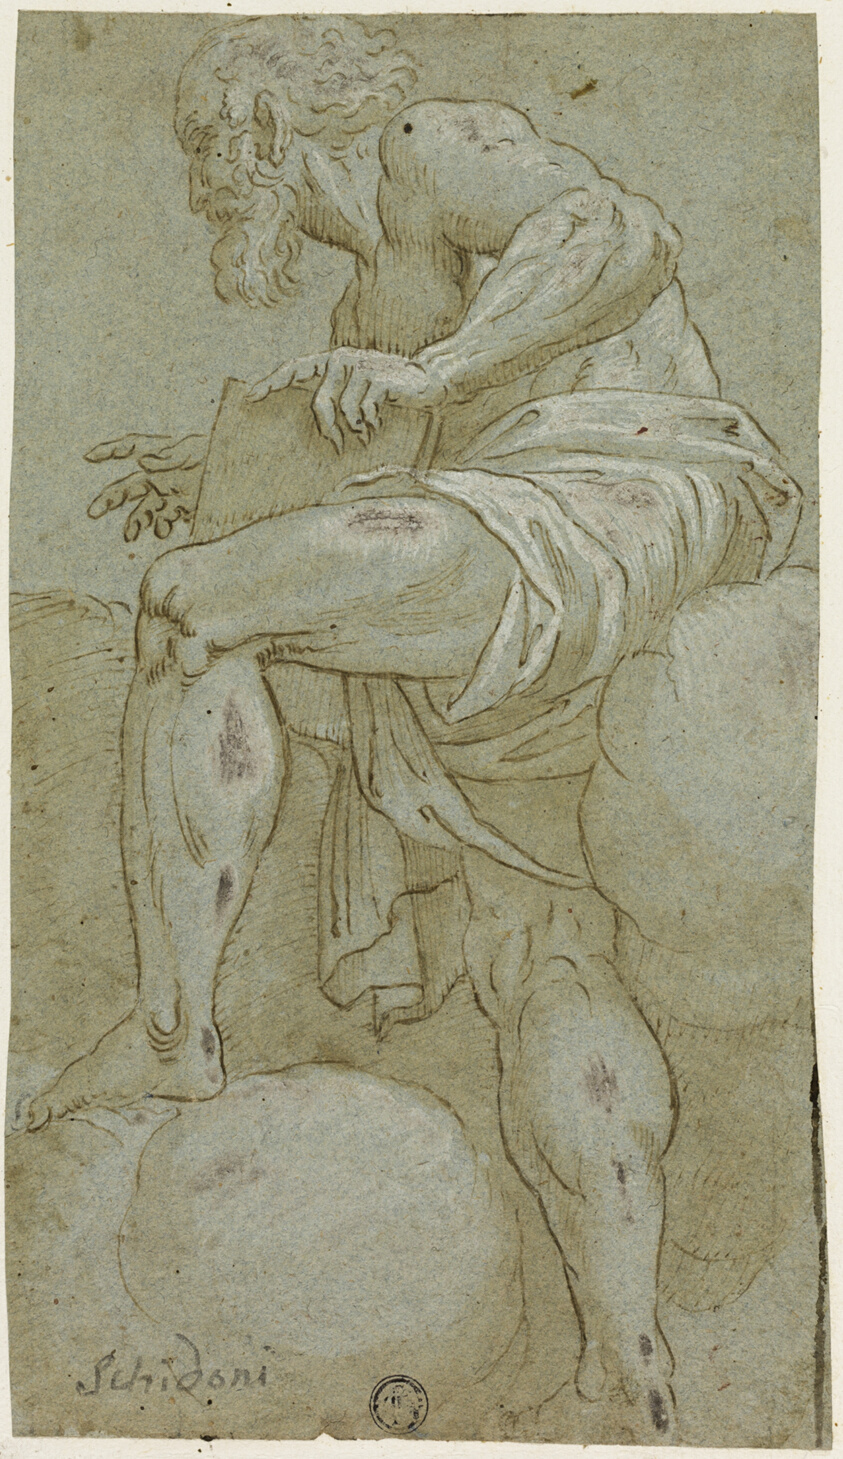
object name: Drawing and Watercolor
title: Standing Prophet Holding a Book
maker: After Lattanzio Gambara; Italian, c. 1530-1574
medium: Pen and brown ink with brush and brown wash, heightened with lead white (partly oxidized), on blue gray laid paper, laid down on ivory laid paper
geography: Italy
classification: ink with wash; drawings (visual works); prints and drawing